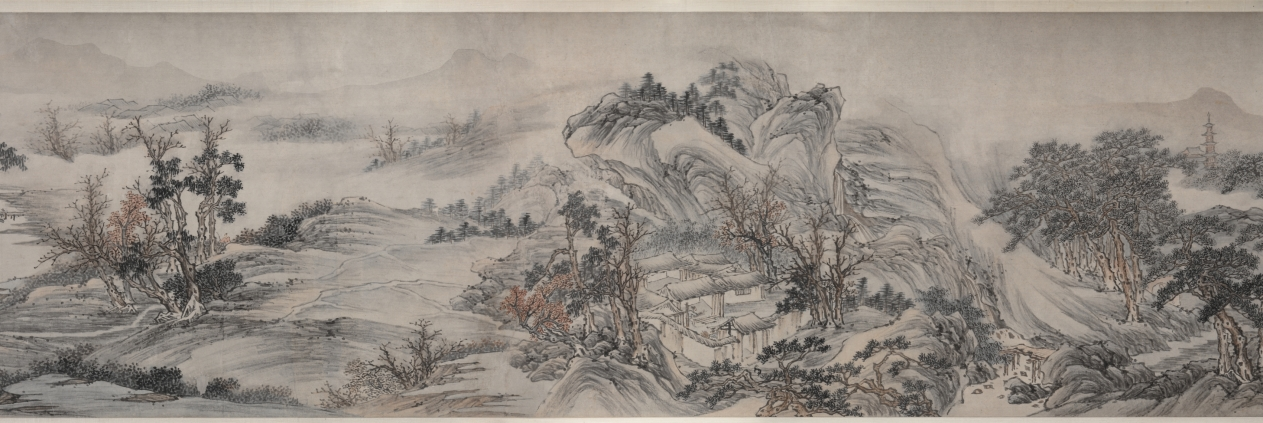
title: Autumn Mist in the Countryside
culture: China, Qing dynasty (1644-1911)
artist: Zou Zhe (Chinese, c. 1610-before 1688)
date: 1647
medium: handscroll, ink and color on paper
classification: Painting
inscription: Artist's inscription, signature, and seal: The first day of the sixth lunar month, the ting-hai year [1647], Tsou Che painted [this]. [seal] Fang-lu.